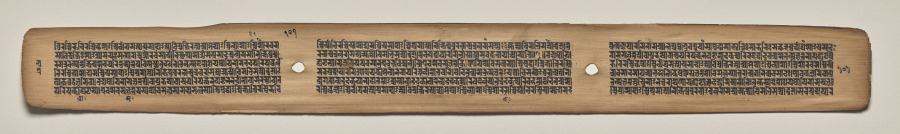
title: Text, Folio 101 (verso), from a Manuscript of the Perfection of Wisdom in Eight Thousand Lines (Ashtasahasrika Prajnaparamita-sutra)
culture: Eastern India, Bihar, Vikramashila Monastery. Painting: Nepal, Kathmandu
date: Sunday, September 14, 1119 (year 239 of the Newar Samvat in the month of Ashvina)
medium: gum tempera and ink on palm leaves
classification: Painting